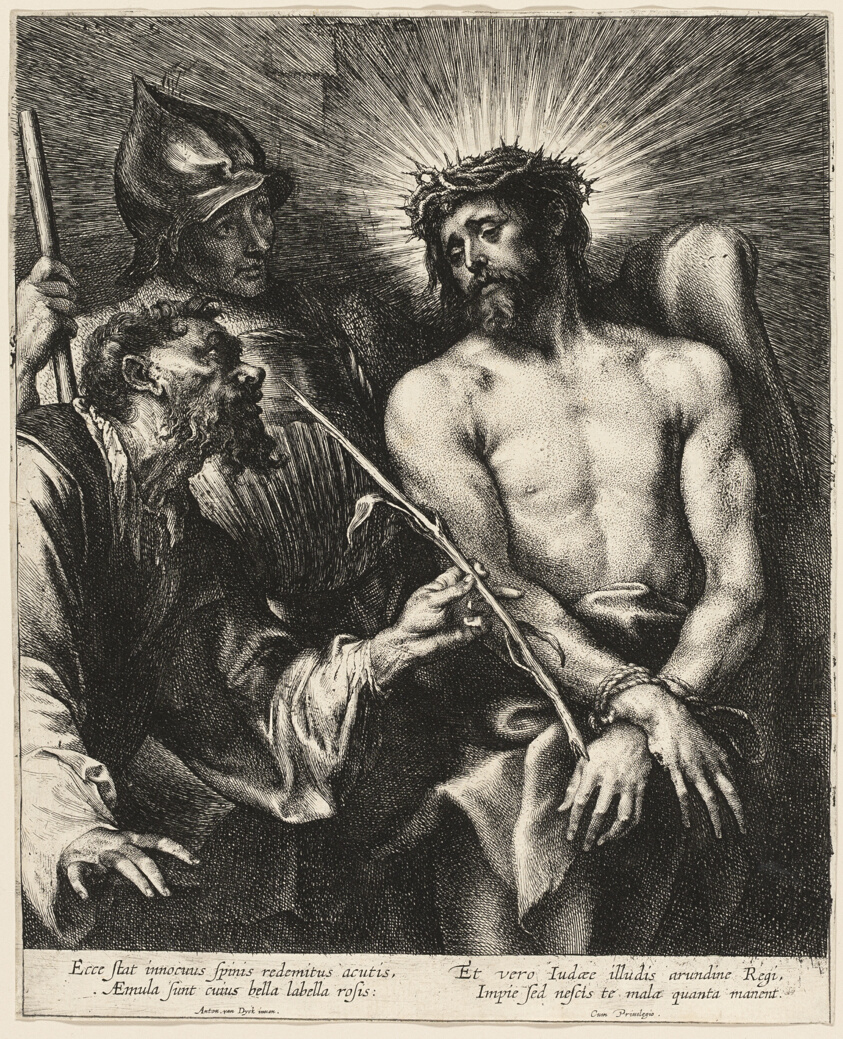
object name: Print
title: The Reed Offered to Christ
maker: Anthony van Dyck (Flemish, 1599-1641); Lucas Vorsterman I (Flemish, 1595-1675)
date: 1630/40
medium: Etching and engraving in black on ivory laid paper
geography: Flanders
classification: etching; print; prints and drawing